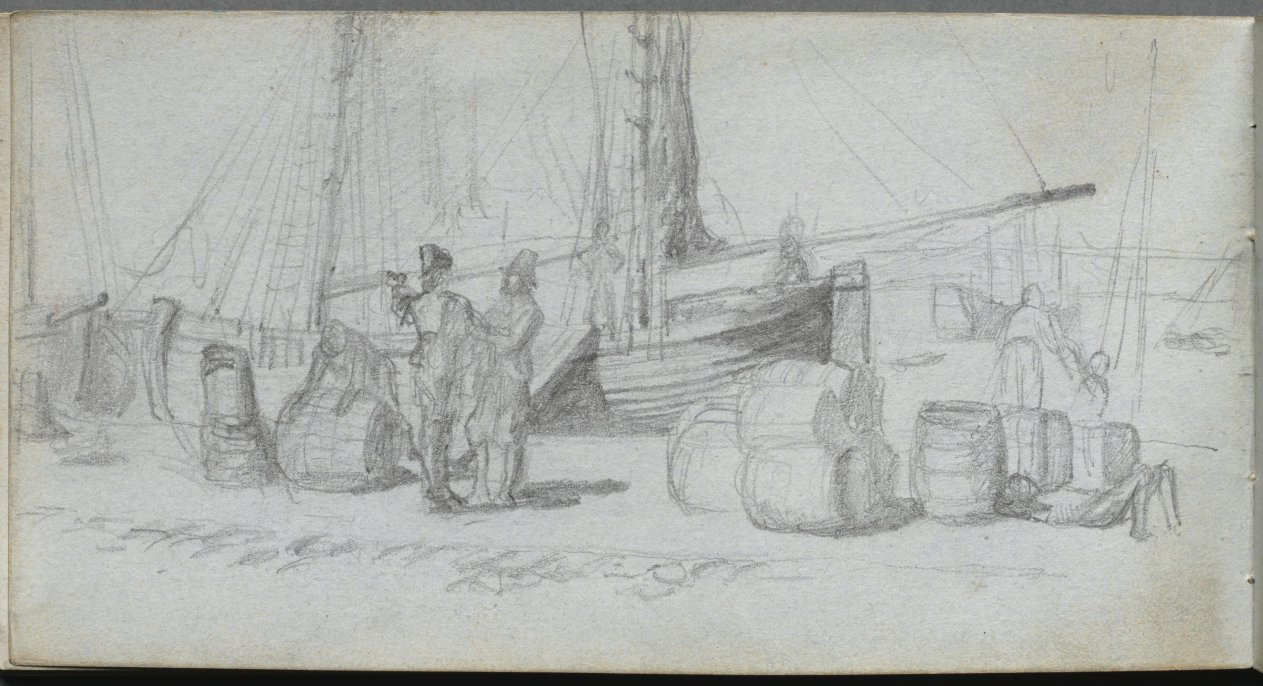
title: Sketchbook, page 50: Boats, Figures, Cargo on a Beach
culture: France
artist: Ernest Meissonier (French, 1815–1891)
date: c. 1860s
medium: graphite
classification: Bound Volume